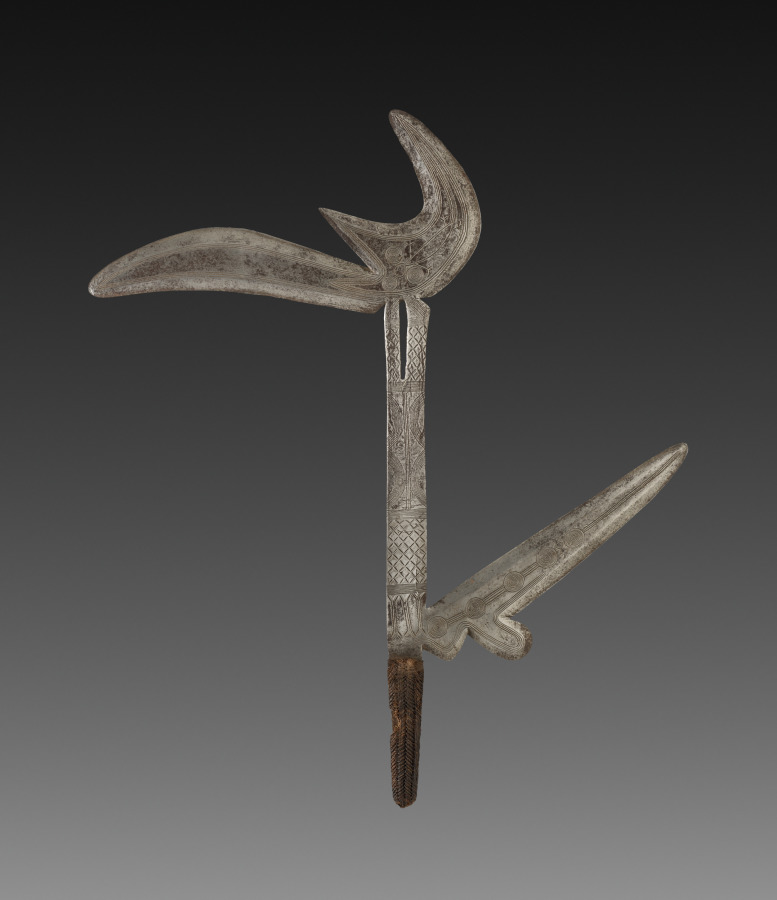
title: Throwing Knife / Prestige Scepter (pingha)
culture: Africa, Central or Eastern Africa, Democratic Republic of the Congo, Central African Republic, and Sudan, Zande-style maker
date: 1800–mid-1900s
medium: Iron alloy and plant fiber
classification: Arms and Armor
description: Throwing knives (pingha, plural kipinga) were historically used by elite Zande men as weapons in the late 1800s and early 1900s. Carefully calibrated, they would spin when thrown or balance on the shoulder when taken into battle. Kipinga were not everyday weapons, but considered property of the king; only those fighting on his behalf like royal bodyguards and court attendants used them. One side of this blade is adorned with complex figural and geometric engravings. No longer used for fighting, kipinga are now a sign of authority and heritage.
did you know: Look closely at the upper blade of this throwing knife to find a representation of a lizard, and at the lower part of the shaft for a crosshatch design resembling lizard skin.